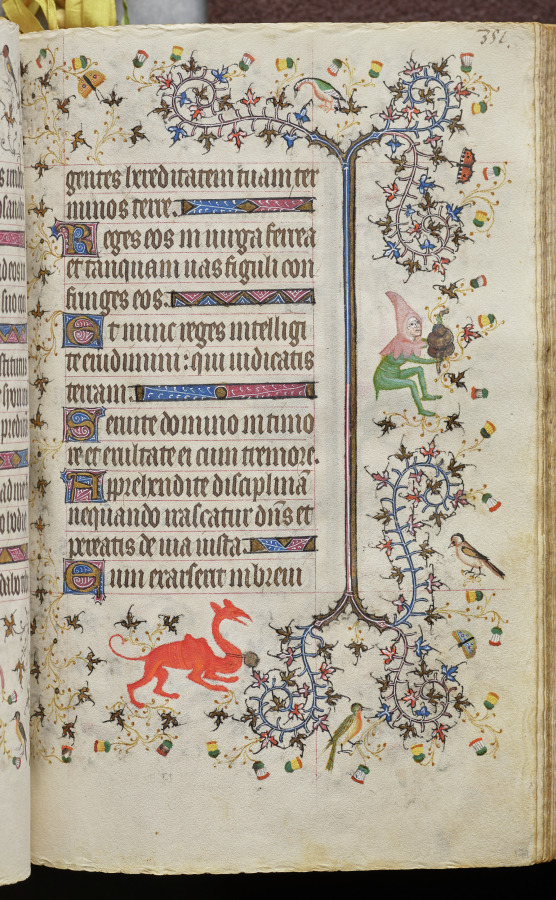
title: Hours of Charles the Noble, King of Navarre (1361-1425): fol. 171r, Text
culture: France, Paris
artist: Master of the Brussels Initials and Associates (French)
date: c. 1405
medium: ink, tempera, and gold on vellum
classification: Bound Volume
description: This precious volume was obviously highly prized by its owner, the French-born King of Navarre, who had his coat of arms painted on no less than twenty folios. Rather than directly commissioning this manuscript from a specific workshop, it seems that Charles the Noble acquired his book of hours -- perhaps ready-made for the luxury market -- while on a trip to Paris in 1404-05. A collaborative effort, six painting styles are evidenced within the pages of this codex, those of two Italians, two Frenchmen, and two Netherlanders. The painter who was responsible for the planning and decoration of the book, and who produced seventeen of the large miniatures, was a Bolognese artist known as the Master of the Brussels Initials. His principal assistant, responsible for most of the borders, was a Florentine who signed his name "Zecho" da Firenze on folio 208 verso.